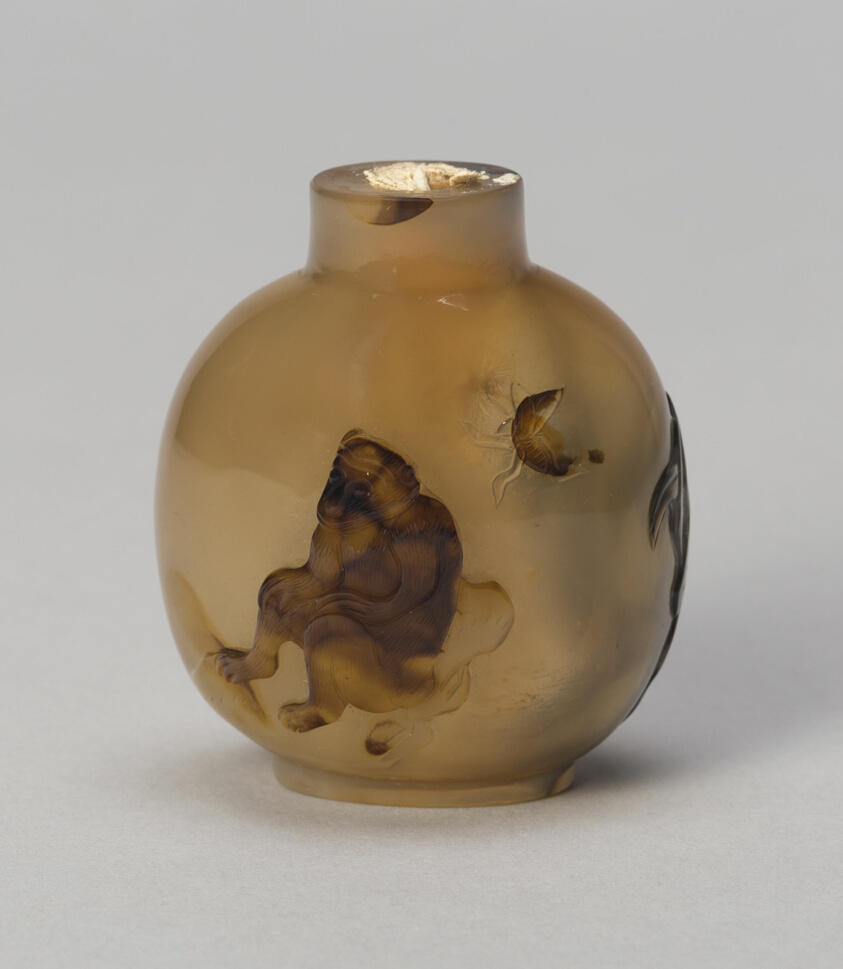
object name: Vessel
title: Snuff Bottle with Monkey on Rockwork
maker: China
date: Qing dynasty (1644–1911), 1760–1830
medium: Suzhou chalcedony with carved decoration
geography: China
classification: snuff bottle; asian art; vessel